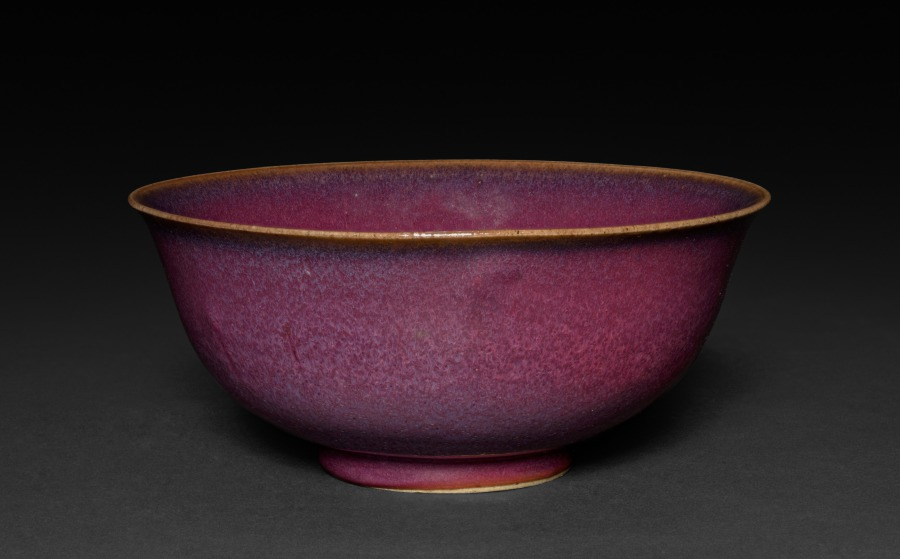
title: Bowl: Jun ware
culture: South China, Yuan dynasty (1271-1368) - Ming dynasty (1368-1644)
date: 14th-15th Century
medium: glazed gray stoneware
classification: Ceramic